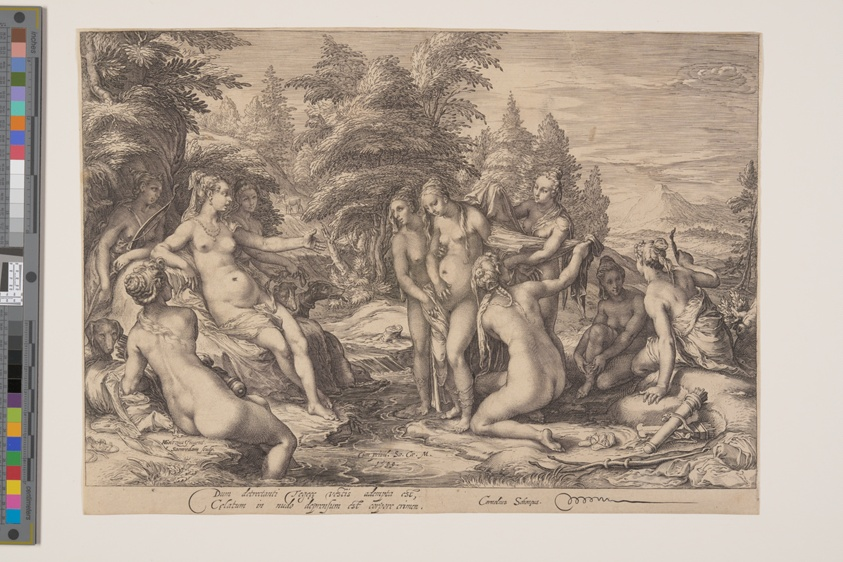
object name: Print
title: Diana and Callisto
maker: Jan Saenredam (Dutch, 1565–1607); after Hendrick Goltzius (Dutch, 1558-1617)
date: 1599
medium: Engraving on ivory laid paper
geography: Netherlands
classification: print; paper; prints and drawing; engraving